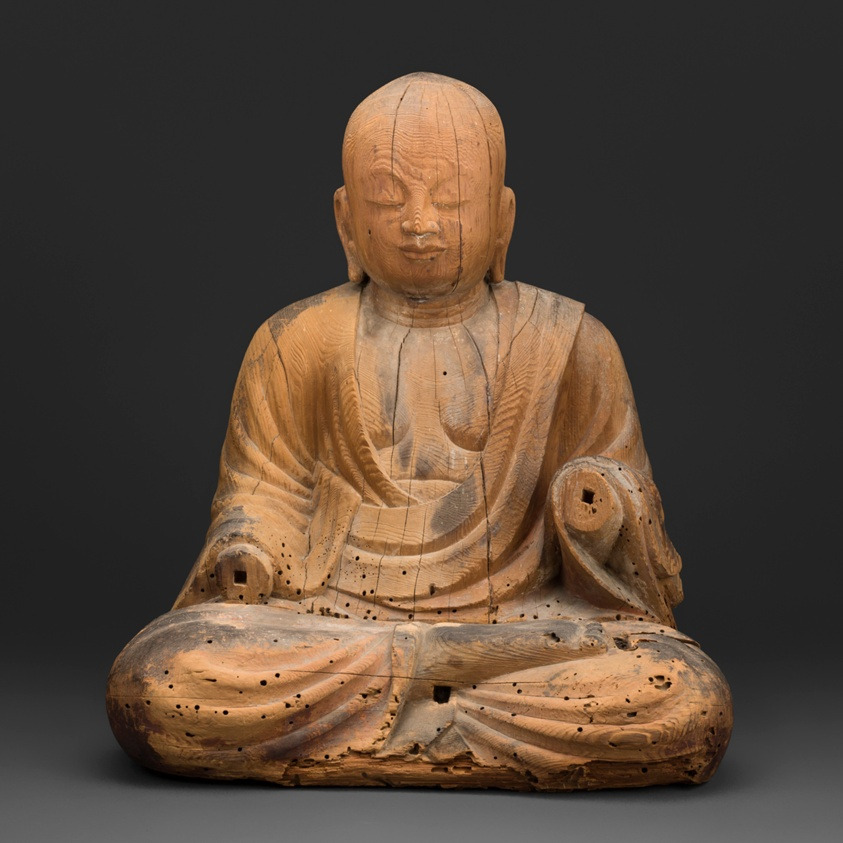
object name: Sculpture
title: Sōgyō Hachiman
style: Japanese (culture or style)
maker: Japan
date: 10th century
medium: Wood with traces of white pigment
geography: Japan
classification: wood; sculpture; asian art